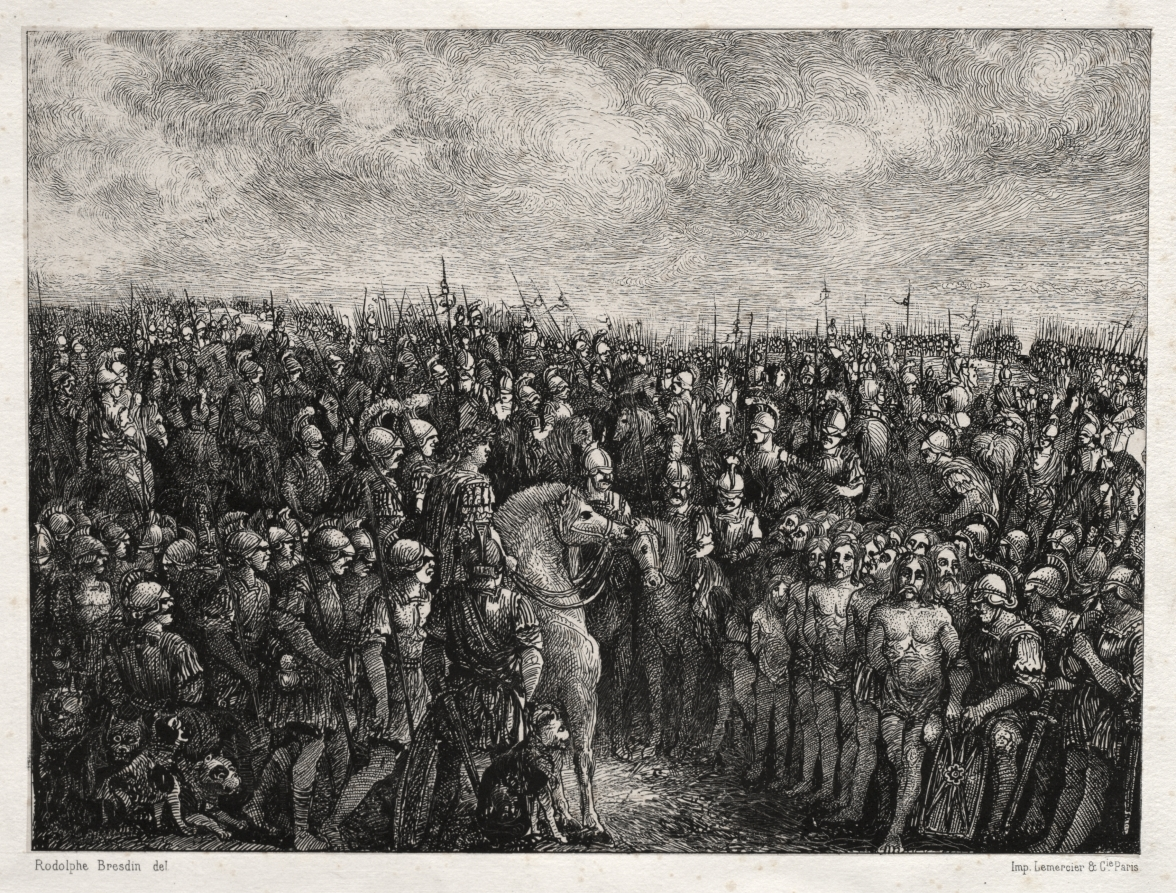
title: Caesar and his Prisoners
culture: France, 19th century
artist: Rodolphe Bresdin (French, 1822–1885)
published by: Lemercier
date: 1878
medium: lithograph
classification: Print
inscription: lower left, in stone: RoDolphe Bresdin; lower left, in stone: Rodolphe Bresdin del. lower right, in stone: Imp. Lemercier & Cie, Paris